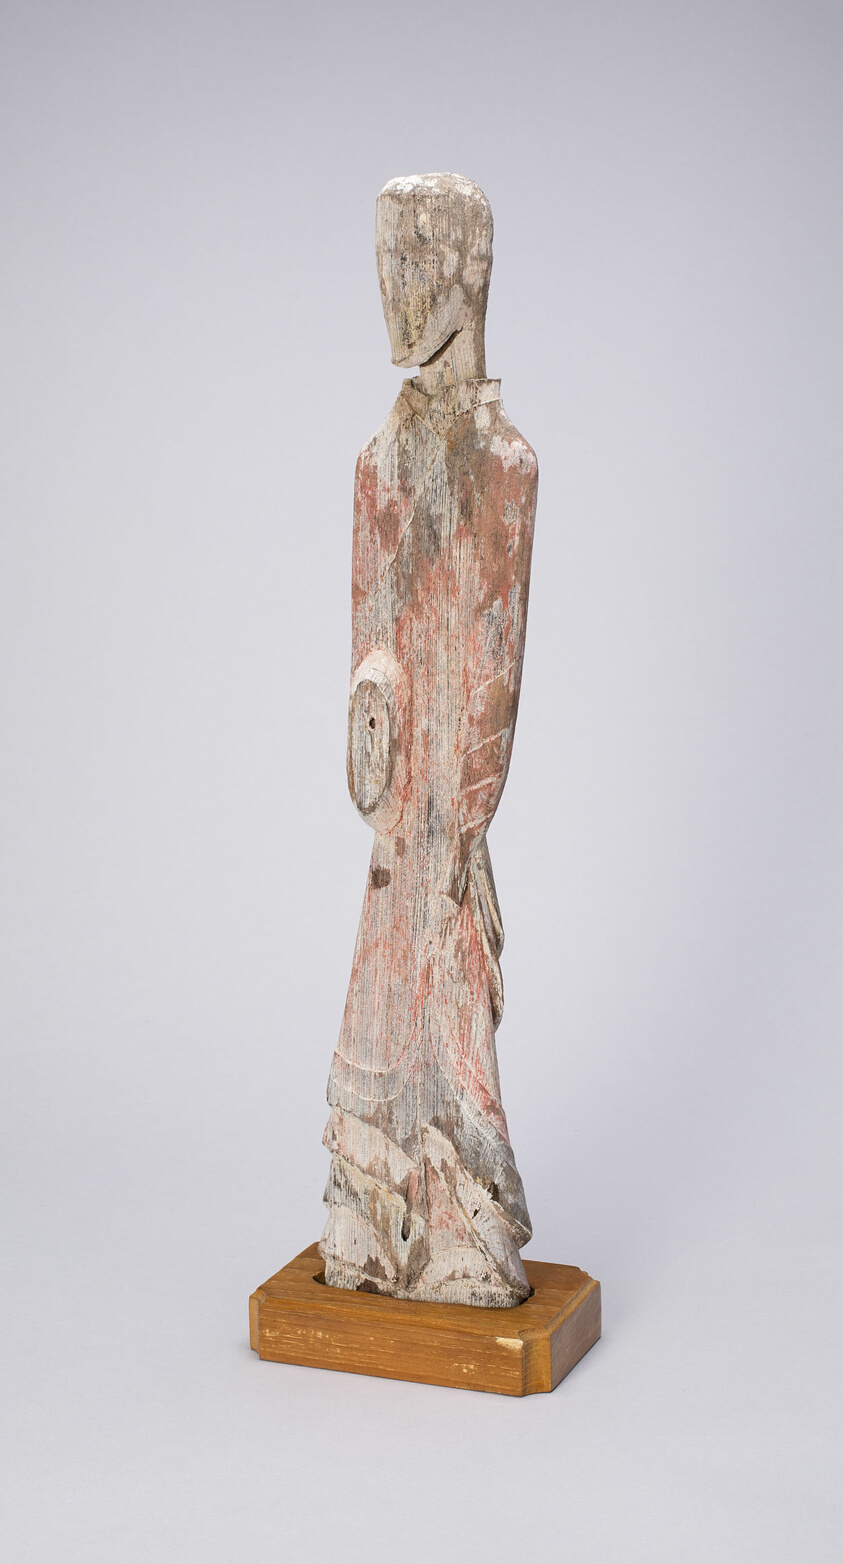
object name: Sculpture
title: Standing Attendant (Tomb Figurine)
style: Chinese (culture or style)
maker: China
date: Warring States period (480–221 BCE), 4th or 3rd century BCE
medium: Wood with traces of polychrome pigments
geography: China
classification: wood; sculpture; asian art